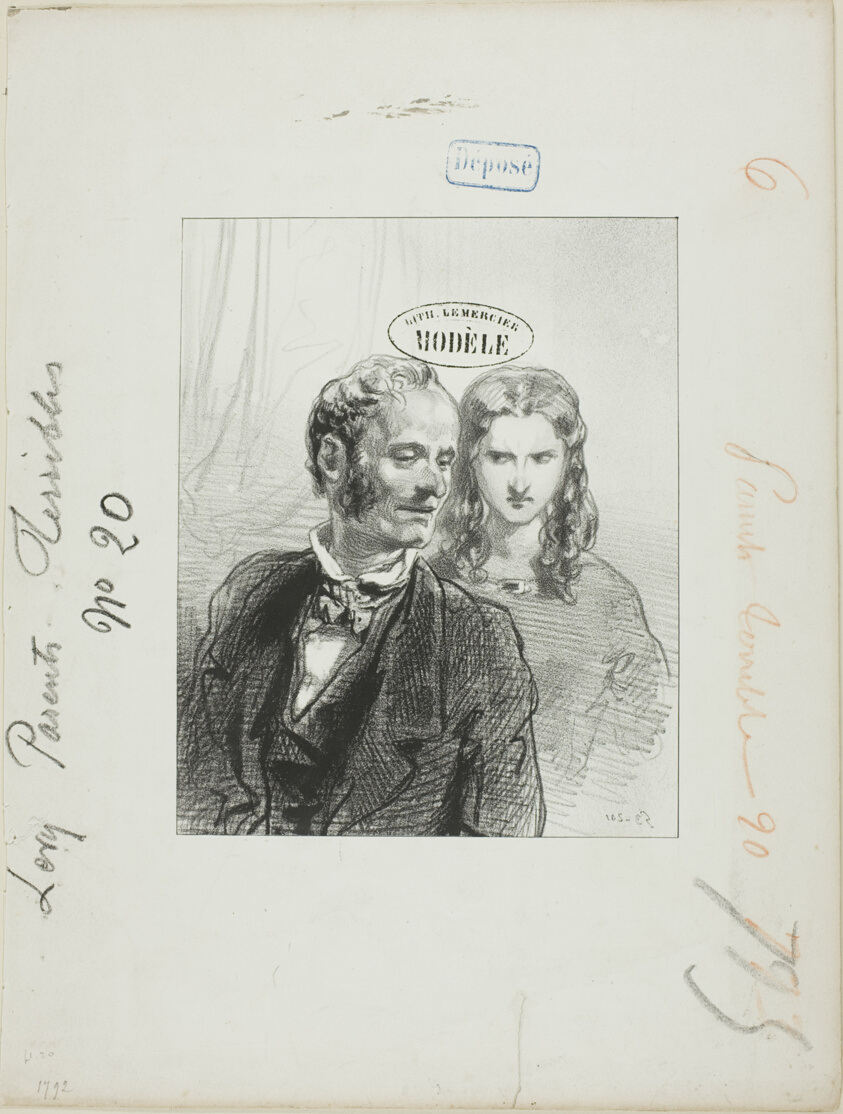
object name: Print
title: Les-Parents-Terribles series: Mr. Charles said to me: What's she got?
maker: Paul Gavarni (French, 1804-1866)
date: 1852–53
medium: Lithograph in black on ivory wove paper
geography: France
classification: lithograph; print; prints and drawing